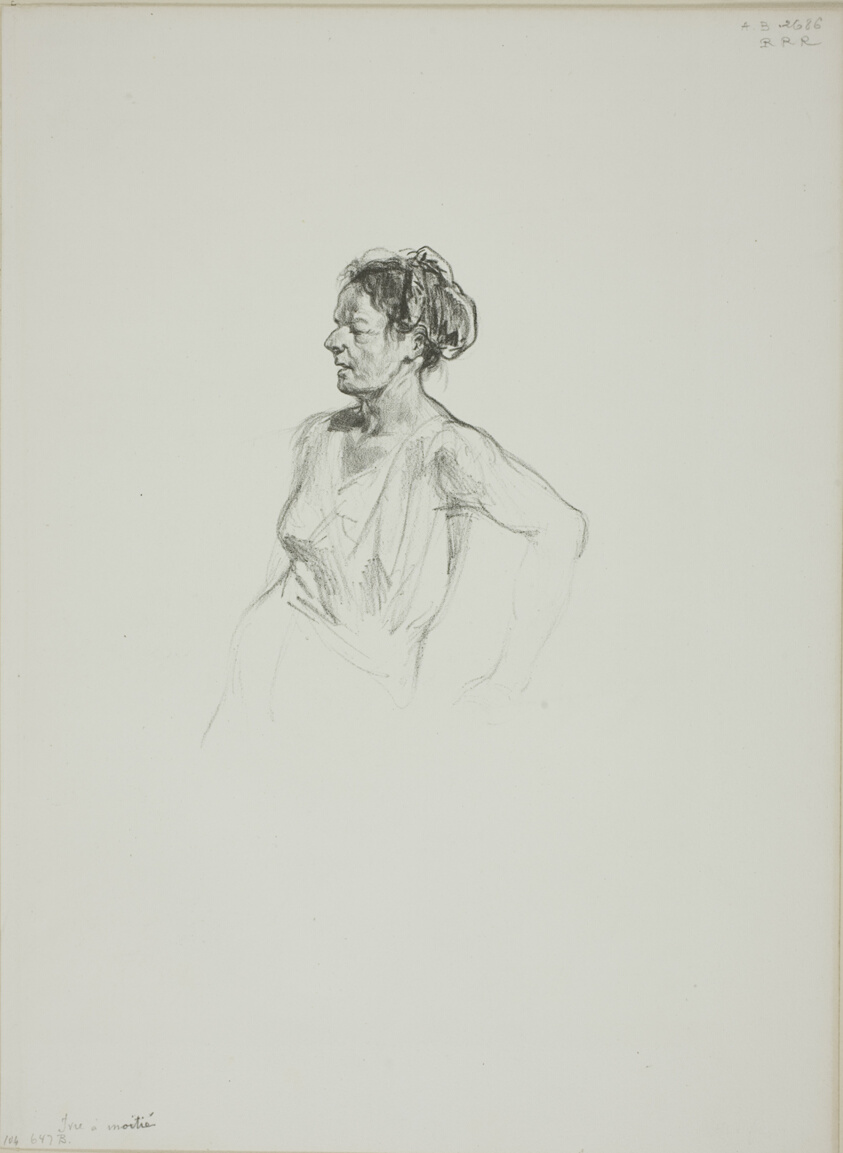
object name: Print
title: Untitled (Half Drunk)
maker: Paul Gavarni (French, 1804-1866)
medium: Lithograph in black on ivory wove paper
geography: France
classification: lithograph; print; prints and drawing